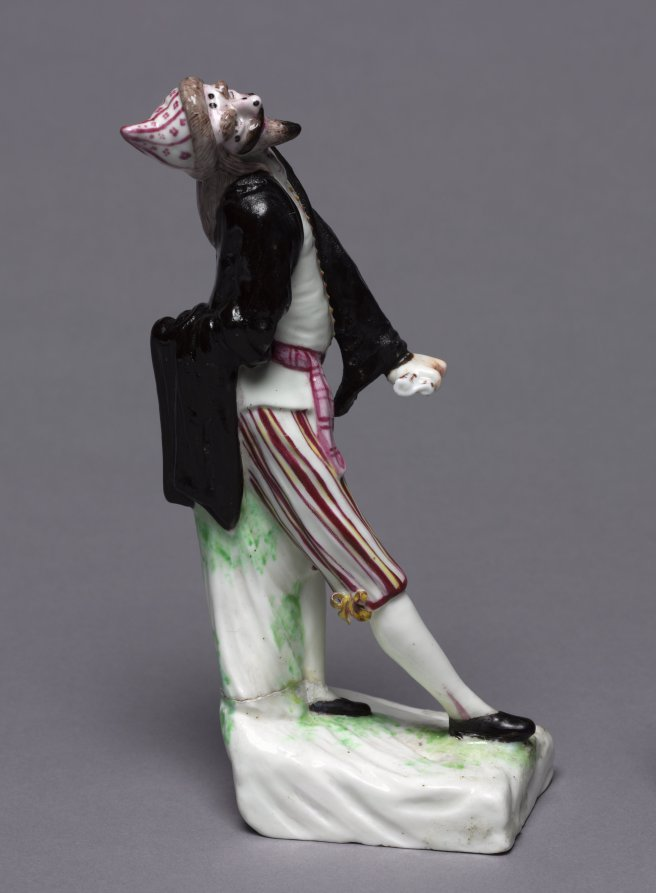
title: Figure of Pantalone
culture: France, Mennecy, 18th century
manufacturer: Mennecy Factory (French)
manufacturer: Mennecy- Villeroy Factory (French)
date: c. 1755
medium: soft-paste porcelain with enamel decoration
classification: Ceramic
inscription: Mennecy-Villeroy factory mark, incised on bottom: "DV"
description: The commedia dell’arte, a form of Italian improvisational theater, became widely popular in 18th-century Europe. This figure, with his prominent beard and distinguishing black robe, represents the character of elderly Venetian merchant Pantalone. Depicted in paintings and porcelain, the popularity of these figures demonstrated the influence of the theater on the tastes of the wealthy.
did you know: In the commedia dell’arte, Pantalone was known for his greed, lust, and buffoonery that made him the target of jokes.